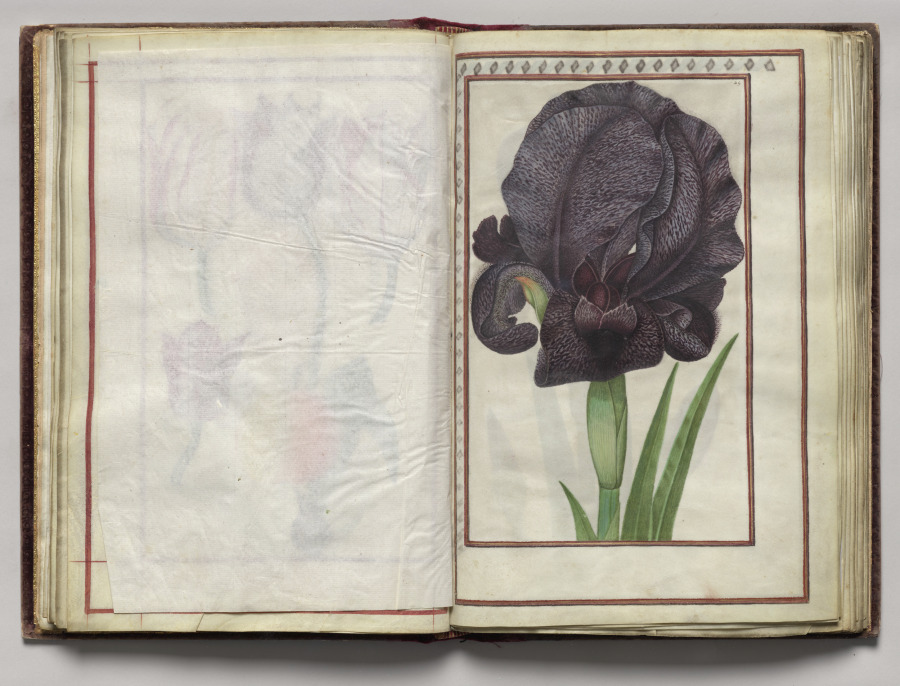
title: Iris, folio 15 (recto), from Florilegium (A Book of Flower Studies)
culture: France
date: 1608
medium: watercolor, ink, silver, and gold over occasional traces of pencil, on vellum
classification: Bound Volume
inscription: Dated: Poitiers 1608 (on frontispiece) Signed: On frontispiece in black ink, lower right: Van Kuyk Notation on drawing: Frontispiece: in pencil, lower margin: * élève de Van Kessel, peintre flammand (* in pencil also appears in front of Van Kuyk's name).